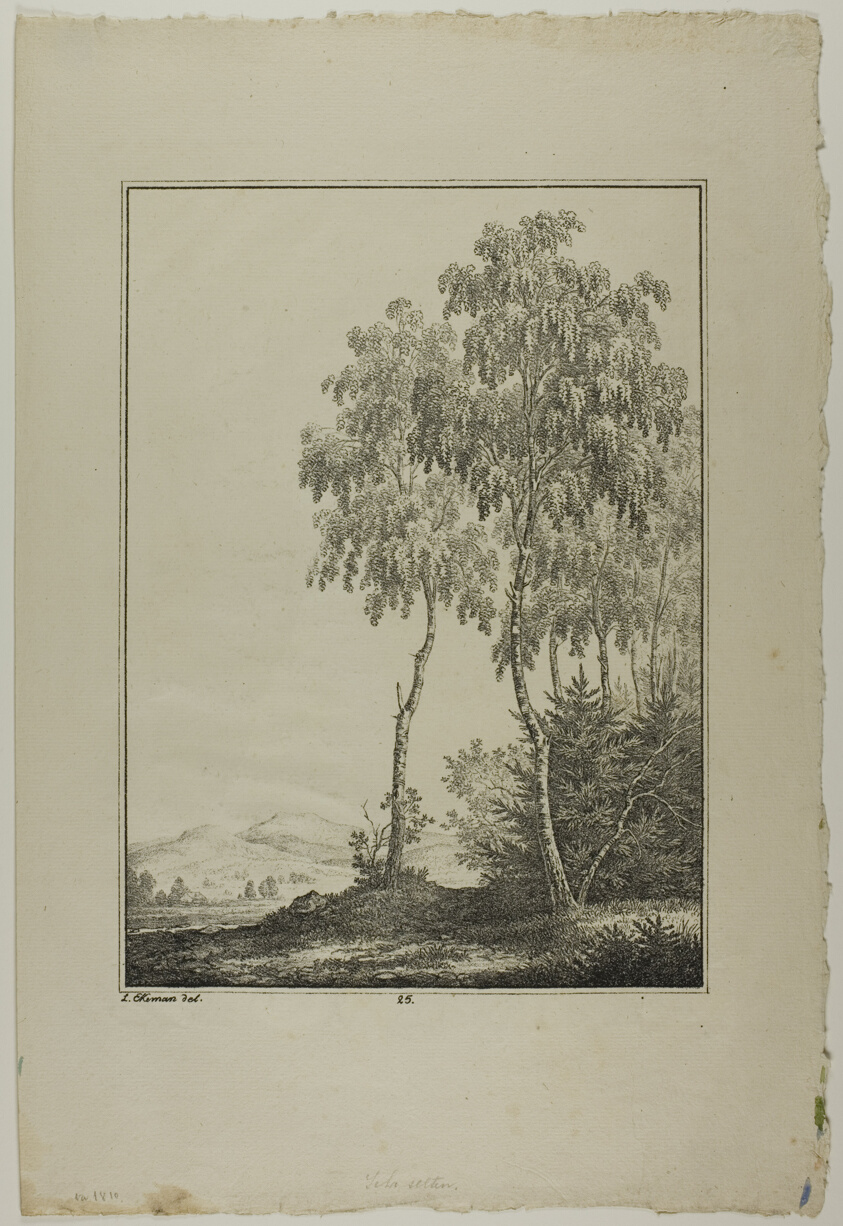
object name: Print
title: Plate 25 from Blatt Baum und Landschafts Studien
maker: Lorenz Ekemann Alesson (Swedish, 1791-1828)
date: c. 1810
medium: Lithograph on paper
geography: Sweden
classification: lithograph; print; prints and drawing